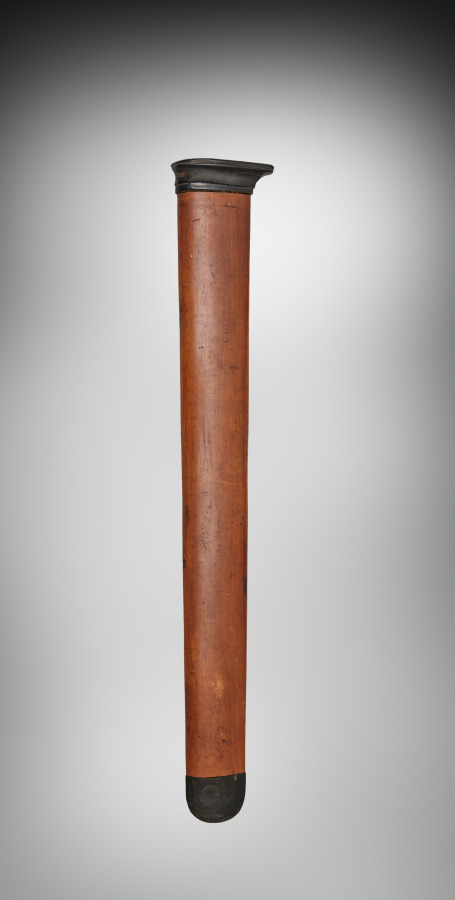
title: Sword and Scabbard (scabbard)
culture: Java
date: 1700s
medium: steel and ivory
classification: Arms and Armor